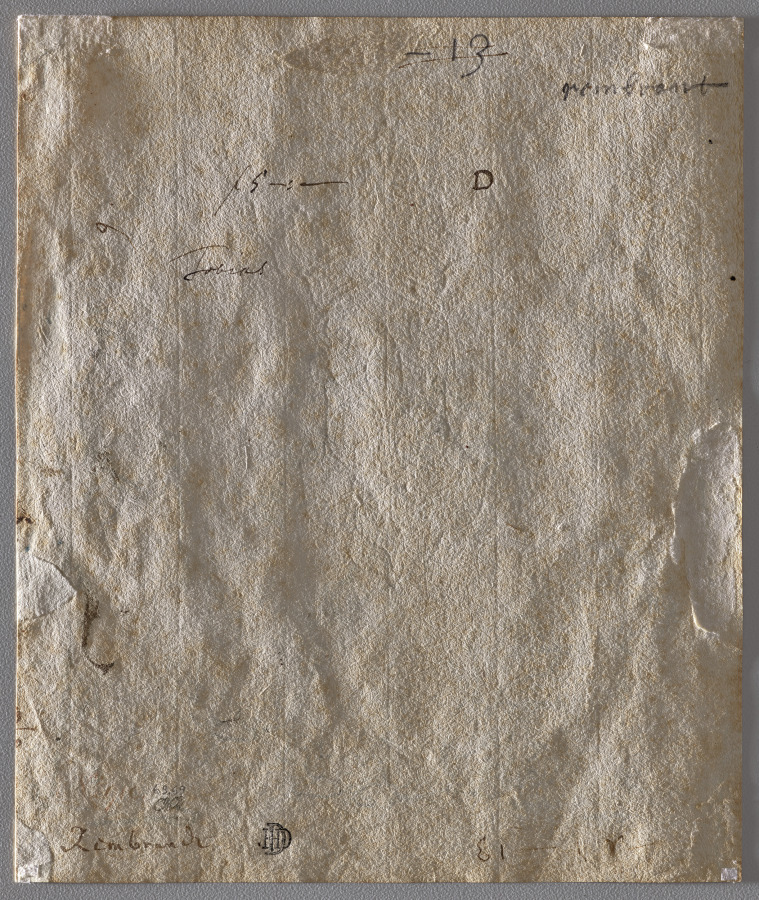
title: Tobias Healing His Father's Blindness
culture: Netherlands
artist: Rembrandt van Rijn (Dutch, 1606–1669)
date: c. 1640–45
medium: Pen and brown ink, touched with white gouache; framing lines in pen and brown ink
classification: Drawing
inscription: verso, upper center, in graphite: -13 [crossed out]; upper right, in black chalk: rembrant; upper right, in brown ink: D; upper center, in brown ink: [15-50?] / Tobias; upper left, in brown ink: 9 [sideways]; lower left, in brown ink: [illegible, cropped]; lower left, in brown ink: No 2910; lower left, in brown ink: Rembrandt; lower right, in brown ink: -d[l?]-13 [upside down]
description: This drawing is a prime example of the Dutch painter Rembrandt van Rijn's innovative approach to biblical narrative, in which he often humanized traditional pictorial formulas through the inclusion of observed details from everyday life. It depicts the climactic moment of the Book of Tobit, an apocryphal book of the Old Testament, in which, instructed by the archangel Raphael, Tobias heals his father Tobit's blindness by rubbing his eyes with fish gall. With spontaneity, a deft hand, and deceptive simplicity in his mark-making, Rembrandt depicts an intimate family scene including the archangel, Tobias, Hannah, and Sarah around a seated Tobit. Hannah’s spectacles, a unique detail among images of the scene created by Rembrandt and his circle, further thematizes sight. Rembrandt’s most innovative addition to the story centers on Tobias, who concentrates intensely to use a scalpel, rather than fish gall, to perform a cataract operation on his father’s left eye. Cataract surgery was a new procedure pioneered in Amsterdam in 1635 by Dr. Job Janszoon van Meekren, and Rembrandt may have witnessed the doctor perform it.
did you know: The seated figure in this drawing is receiving cataract surgery on his left eye, a procedure pioneered in Amsterdam in 1635 by Dr. Job Janszoon van Meekren.